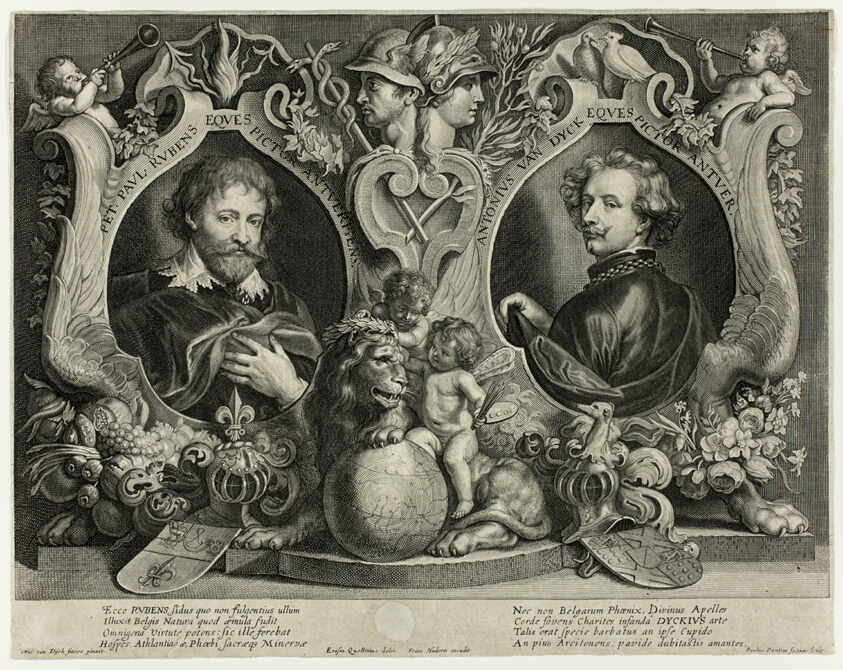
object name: Print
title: Double Portrait of Rubens and Van Dyck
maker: Paulus Pontius (Flemish, 1603–1658); after Anthony van Dyck (Flemish, 1599–1641), with Erasmus Quellinus (Flemish, 1607–1678); published by Frans Huberti (Flemish, 1650–1687)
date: 1645/58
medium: Engraving in black on ivory laid paper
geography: Flanders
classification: engraving; paper; print; prints and drawing